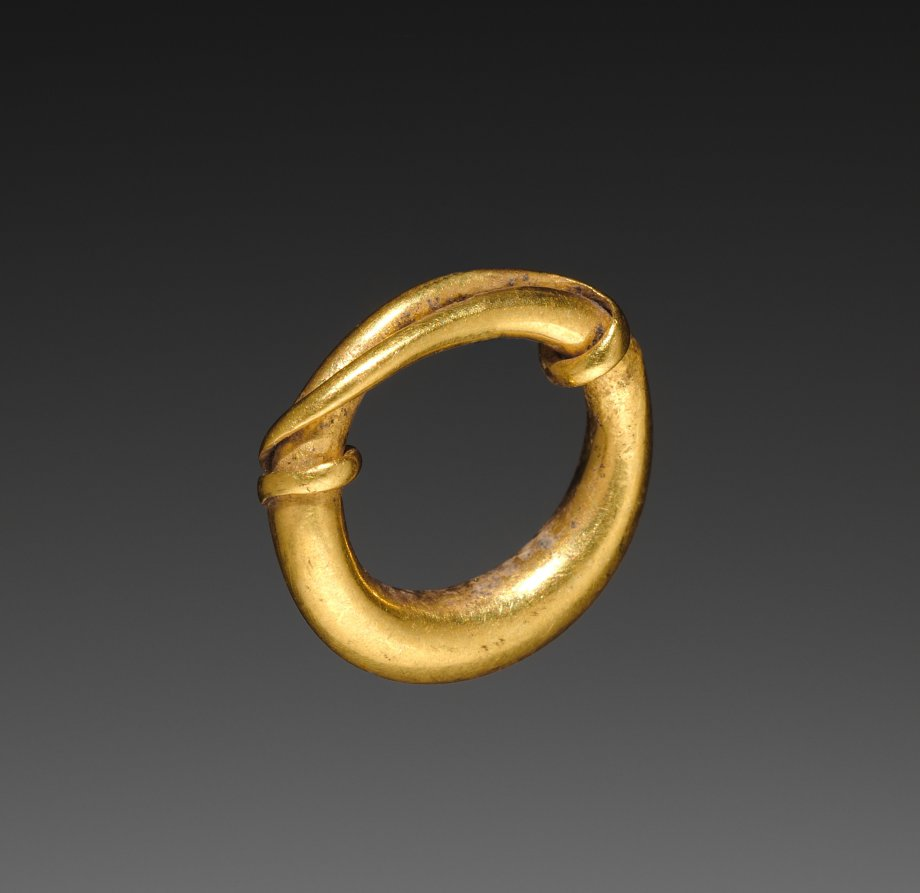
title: Ring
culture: Parthian Empire (247 BCE–224 CE)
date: 1–200 CE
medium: gold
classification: Jewelry